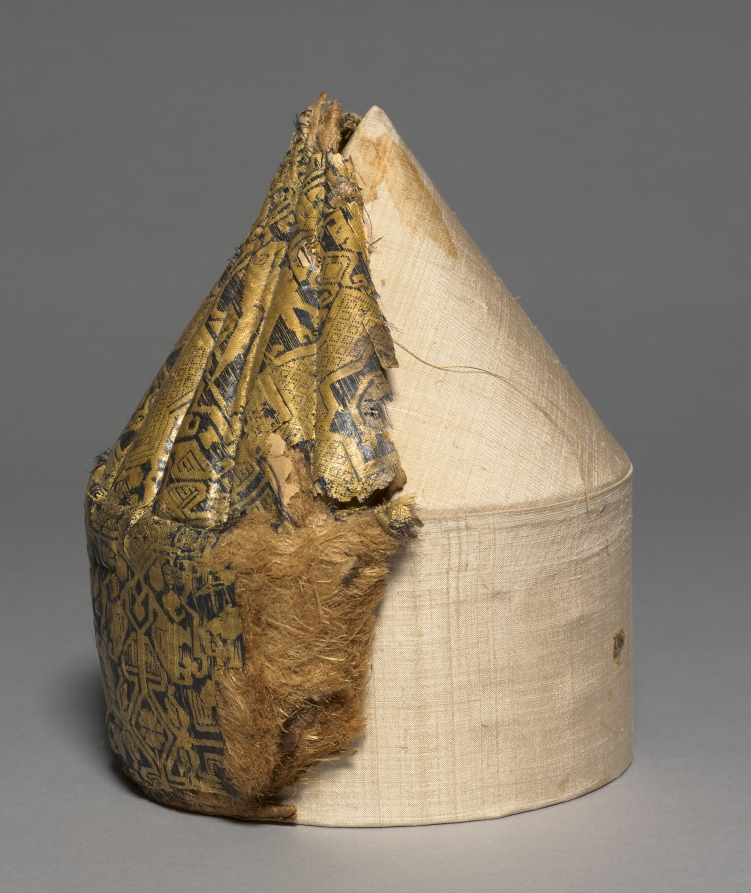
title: Quilted cap with star-patterned silk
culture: Iran or Iraq, Buyid or Seljuq period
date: 1000s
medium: lampas: silk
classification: Textile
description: This quilted hat is one of a number of hats that have been recovered from Egyptian graves. It consists of silk sewn to a heavily quilted form, the top part of which is ribbed. The design of the silk is based on an eight-pointed star with paired birds above and stylized palmettes in the interspaces. Such hats were worn with or without a turban by persons of ranks.